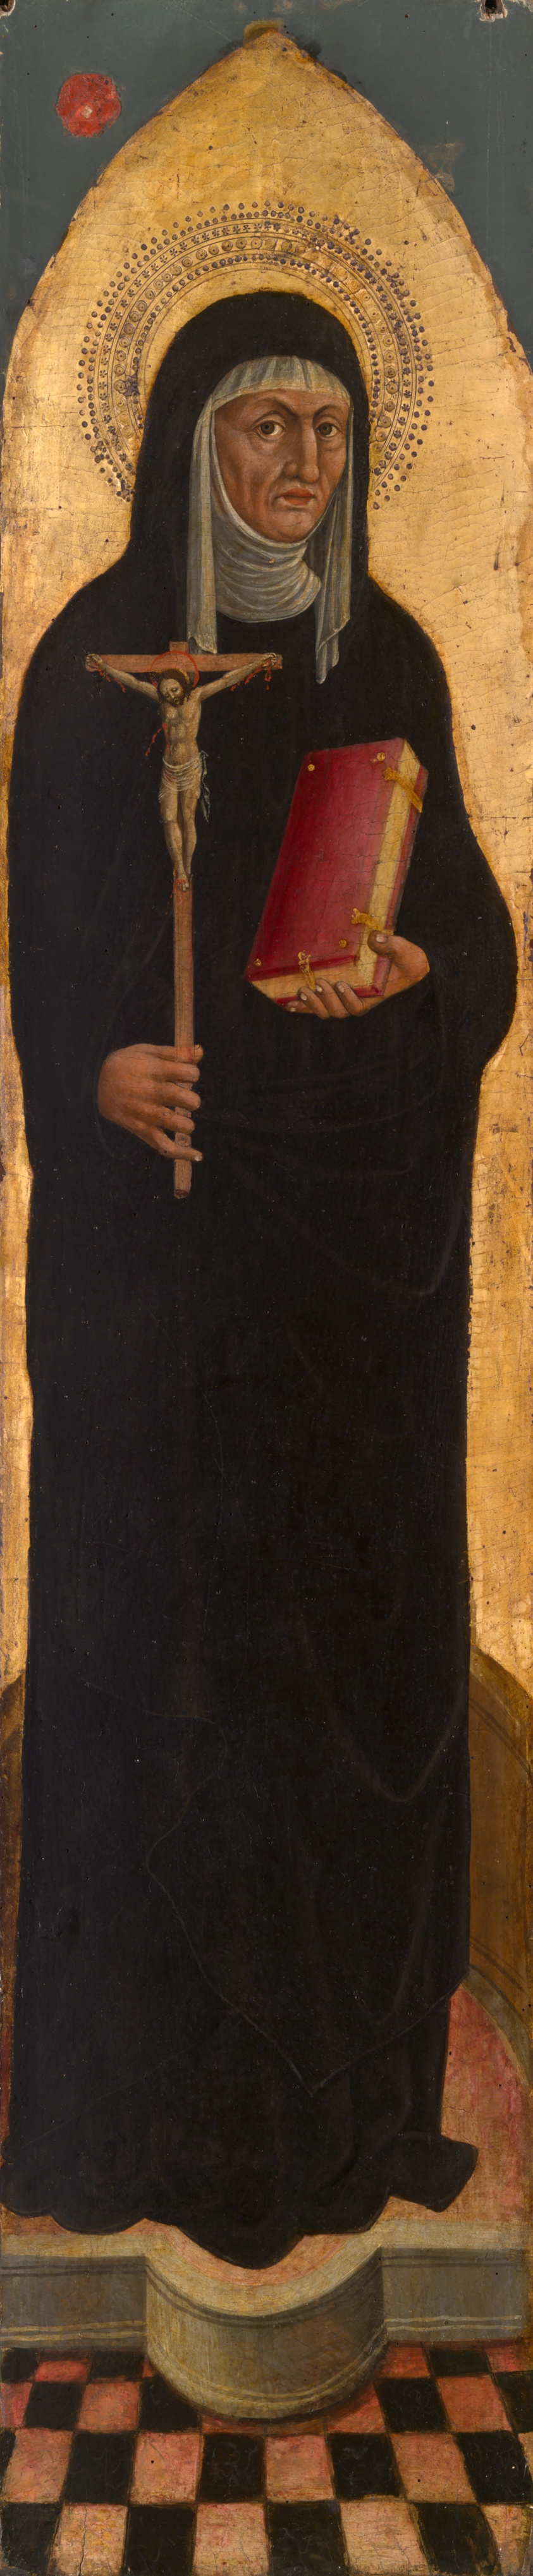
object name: Painting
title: Saint Monica from an Augustinian altarpiece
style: 15th century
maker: Italian; possibly Venice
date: 1450/75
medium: Tempera and oil on panel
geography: Venice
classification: tempera; altar; altarpiece; Italian; oil on panel; oil paintings (visual works); paint; painting; european painting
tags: saints, altar, bibles, book, Christian subjects, Christianity, crucifixions, Devotion, religion, religious, religious figures, women